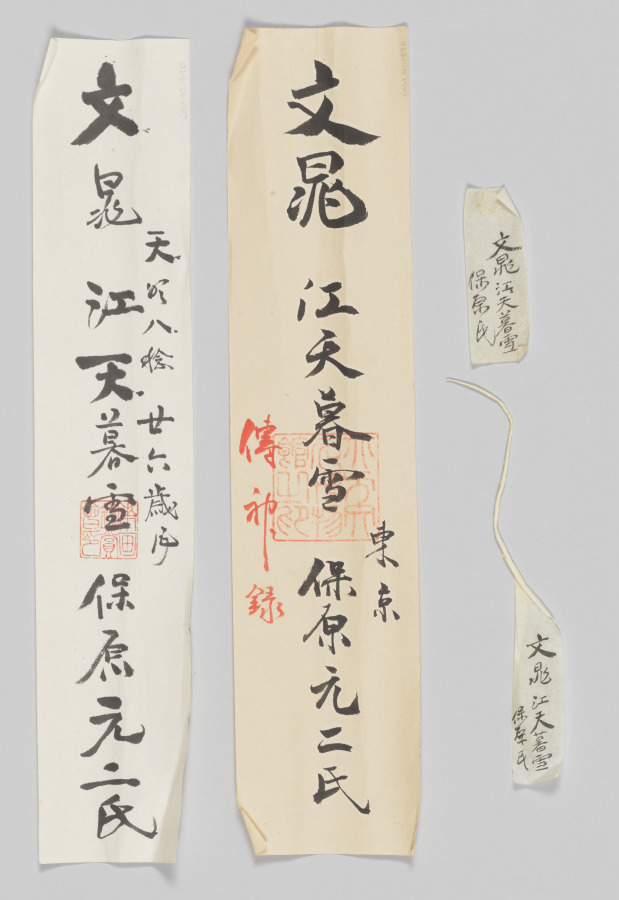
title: Evening Snow Blending River and Sky, from Eight Views of Xiao-Xiang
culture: Japan, Edo period (1615–1868)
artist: Tani Bunchō (Japanese, 1763–1841)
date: 1788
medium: album leaf remounted as a hanging scroll; ink and color on paper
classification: Painting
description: This painting was part of a set of album leaves representing the Eight Views of Xiao-Xiang, a theme originating in Chinese poetry and painting that spread to both Korea and Japan. Southern China’s Xiao-Xiang area, where the mist-covered banks of the Xiang River created a complex landscape shifting like the moods and minds of people, captured the imaginations of generations of painters and calligraphers. Inscriptions on these works suggest that they were possibly ordered by newly prominent Japanese Confucian scholars.